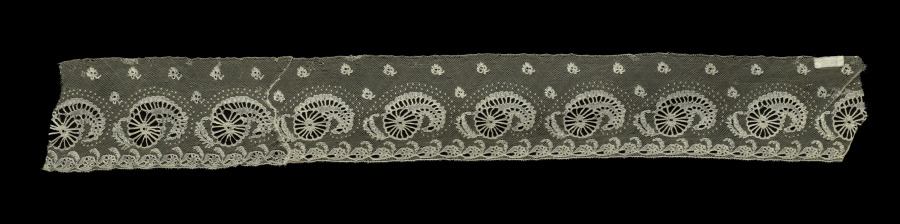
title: Lace Edging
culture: England, Bedfordshire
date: 1800–1820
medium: Silk: bobbin lace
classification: Lace